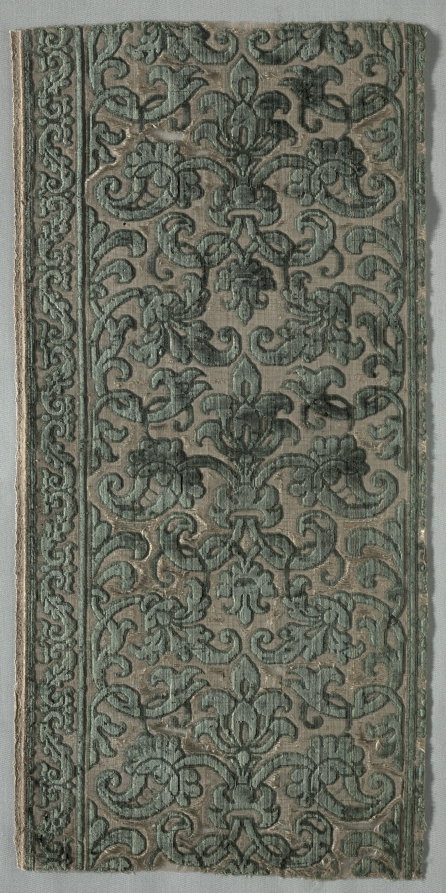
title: Velvet Fragment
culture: Italy, late 16th century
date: late 1500s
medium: velvet (cut and uncut); silk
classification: Velvet